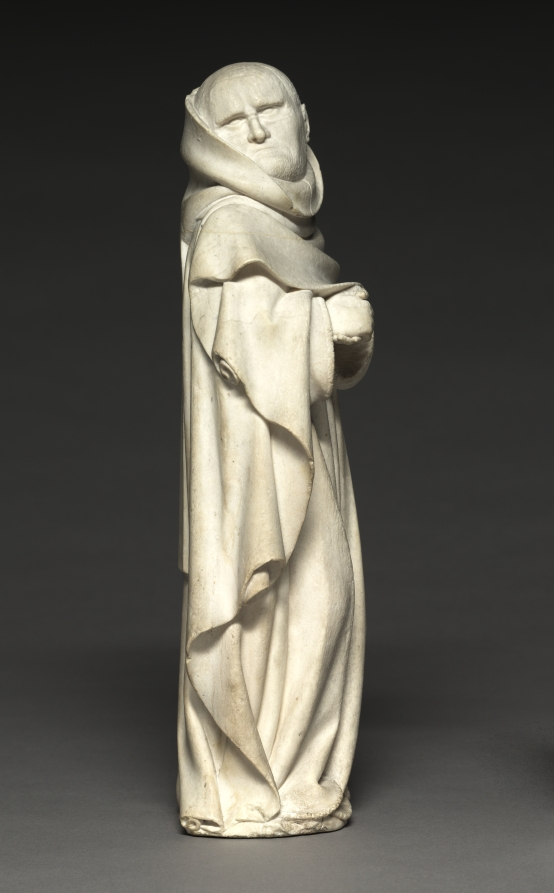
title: Mourner from the Tomb of Philip the Bold, Duke of Burgundy (1364–1404)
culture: Netherlands, active Dijon, 15th century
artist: Claus de Werve (Netherlandish, 1380–1439)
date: 1404–10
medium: vizille alabaster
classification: Sculpture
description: This figure comes from the tomb of Duke Philip the Bold from the church of Champmol near Dijon (Burgundy, France). Philip, who founded the monastery and designated it as his burial place, hired the best artists, many of whom came from the Netherlands. While the commission was given in 1381, the work was not completed until 1410, six years after the duke’s death. This mourner is unusual for the time because it is not carved as a static low relief on the pedestal of the tomb but interact with the viewers and their fellow procession members. The lifelike quality of the figure is due in large part to the alabaster. Its softness allowed artists to carve details into the material, and the transparent, milky white stone could also be polished to a high gloss.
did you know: The use of alabaster in the late Middle Ages began in the 1300s with court art in the circles of French kings, especially in the field of funerary sculpture.